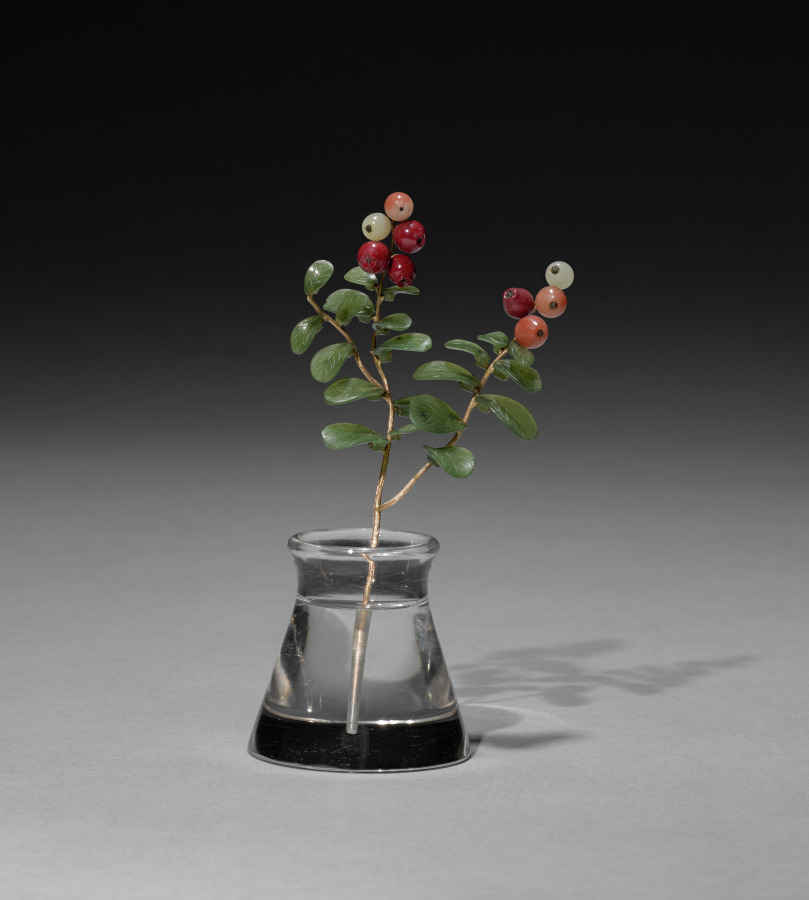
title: Flower Study of a Lowbush Cranberry or Lingonberry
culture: Russia, St. Petersburg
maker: House of Fabergé (Russian, 1842–1918)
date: c. 1885–1915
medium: chalcedony, jade, rock crystal, gold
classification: Miscellaneous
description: This flower study depicts a lowbush cranberry or lingonberry. To achieve a naturalistic effect of ripening fruit, Fabergé varied the coloring of the berries. Some are made of chalcedony in hues of milky white to represent unripe berries, while others appear in deep reddish agate to represent ripe ones. Fabergé’s inspiration for his flower studies is said to have come from the floral brooches of precious stones that were made in the 1700s for Catherine the Great as well as from the Japanese art of flower arranging, known as ikebana. Fabergé’s flower studies were given as intimate gifts to friends by the tsarina and others in the court. She also liked to take them around to wherever the imperial family was residing as a reminder of spring during the harsh Russian winters.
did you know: The stems of Fabergé’s flower studies are set into little basins carved from rock crystal to resemble pots of water.